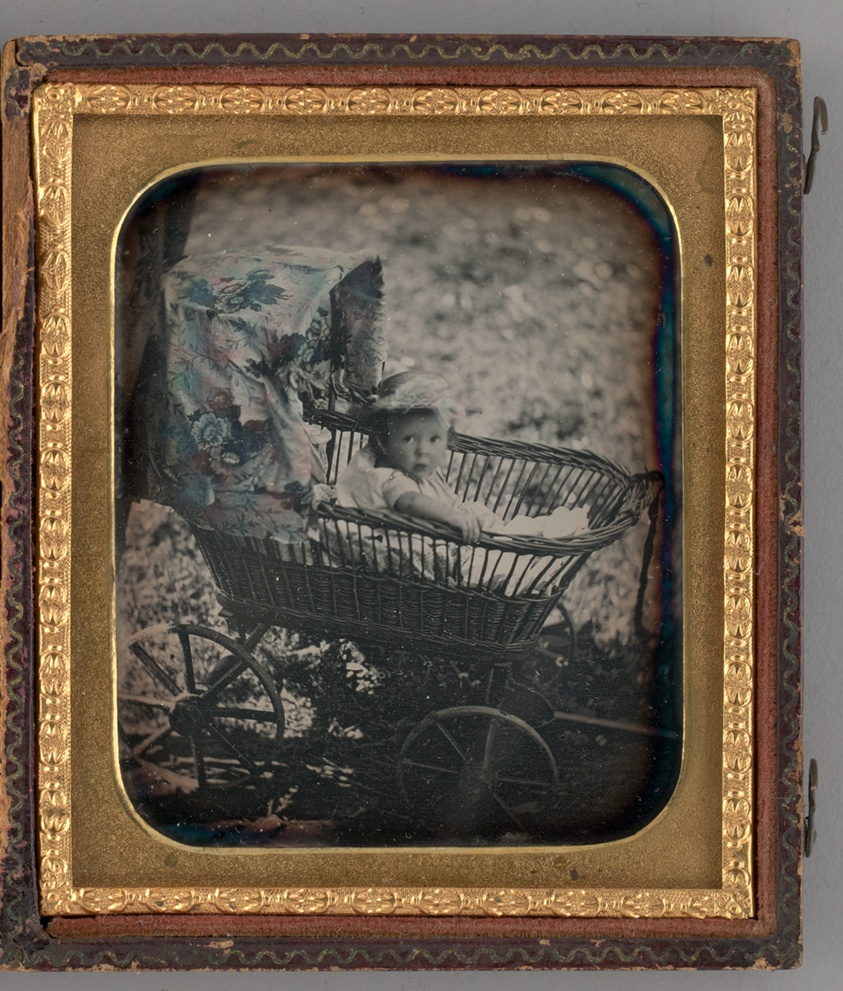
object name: Photograph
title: Untitled (Portrait of Baby)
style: 19th century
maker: Unknown maker; American, 19th century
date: 1853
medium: Daguerreotype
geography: United States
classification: portrait; photograph; photographic process; photography; portrait; daguerreotype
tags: lundberg collection, portrait, babies, portraits, portraits: child subject, photography